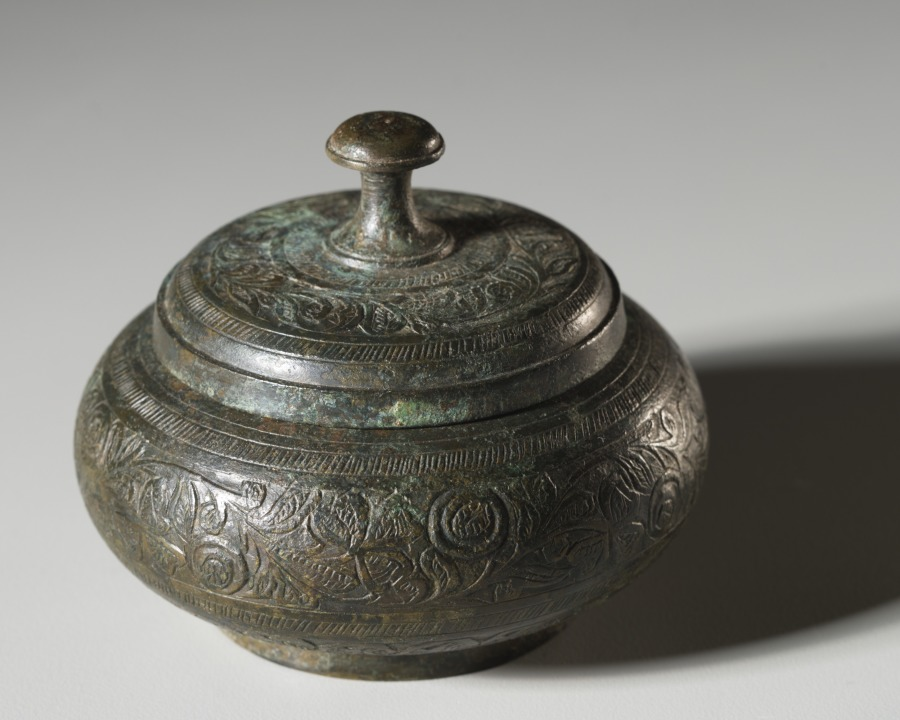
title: Reliquary Box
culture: Pakistan, Gandhara, probably Swat, late Kushan period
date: 200–400 CE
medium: bronze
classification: Metalwork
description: This casket in bronze represents the great variety of reliquary caskets. It is round, has a low foot, and is covered with a lid (with raised handle) that fits over the vessel rather than being inset. It is a traditional shape frequently encountered in Gandharan reliquaries, but its slight flattening and elaborate decoration imply a slightly late date. A central band of a floral creeper decorates the main body of the box and its lid, and is framed on both sides by narrower fluted bands. This type of freehand design is characteristic of the late Kusana-early Gupta period. Similar floral patterns are found in another CMA object (1972.164), the lid of a box showing combat between a man and a lion, which also dates to a later period. There the design fills the vacant areas in the busy composition. This pattern, however, has its antecedents in the Begram ivories . which, according to most sources, pre-date the Sasanian invasion of the mid-third century AD. Therefore, it can be assumed that this type of floral decoration was already in use in the third century and that this reliquary box probably dates to the third-fourth century AD. The bronze alloy, in its somewhat silverish-metallic appearance, seems to be very close to the material used in the Swat bronzes, which suggests that Swat may also be the provenance for this reliquary.